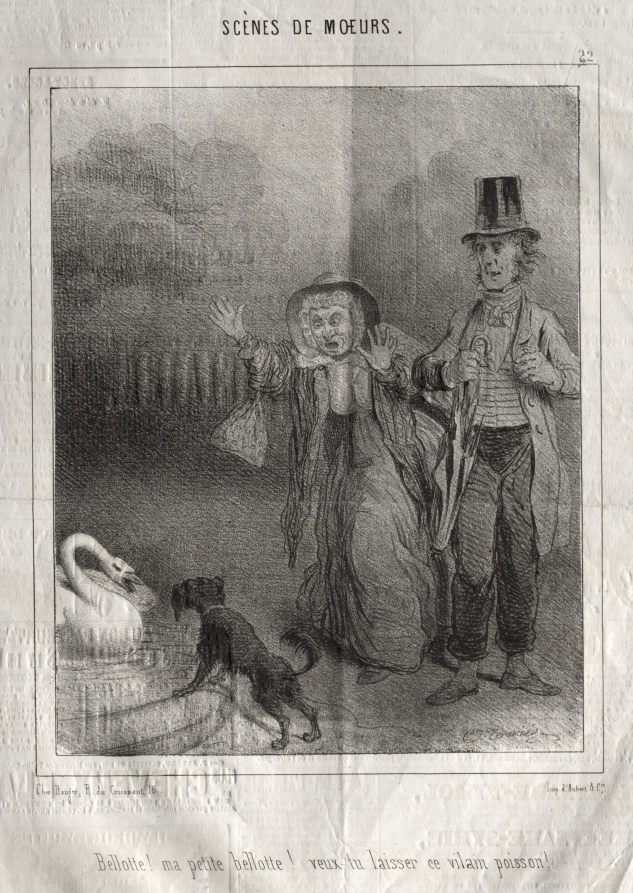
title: Scènes de moeurs: Bellotte! ma petite Bellote! veux-tu laisser ce vilain poisson!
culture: France, 19th century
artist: Charles Joseph Traviès de Villers (French, 1804–1859)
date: c. 1830–45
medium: lithograph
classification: Print